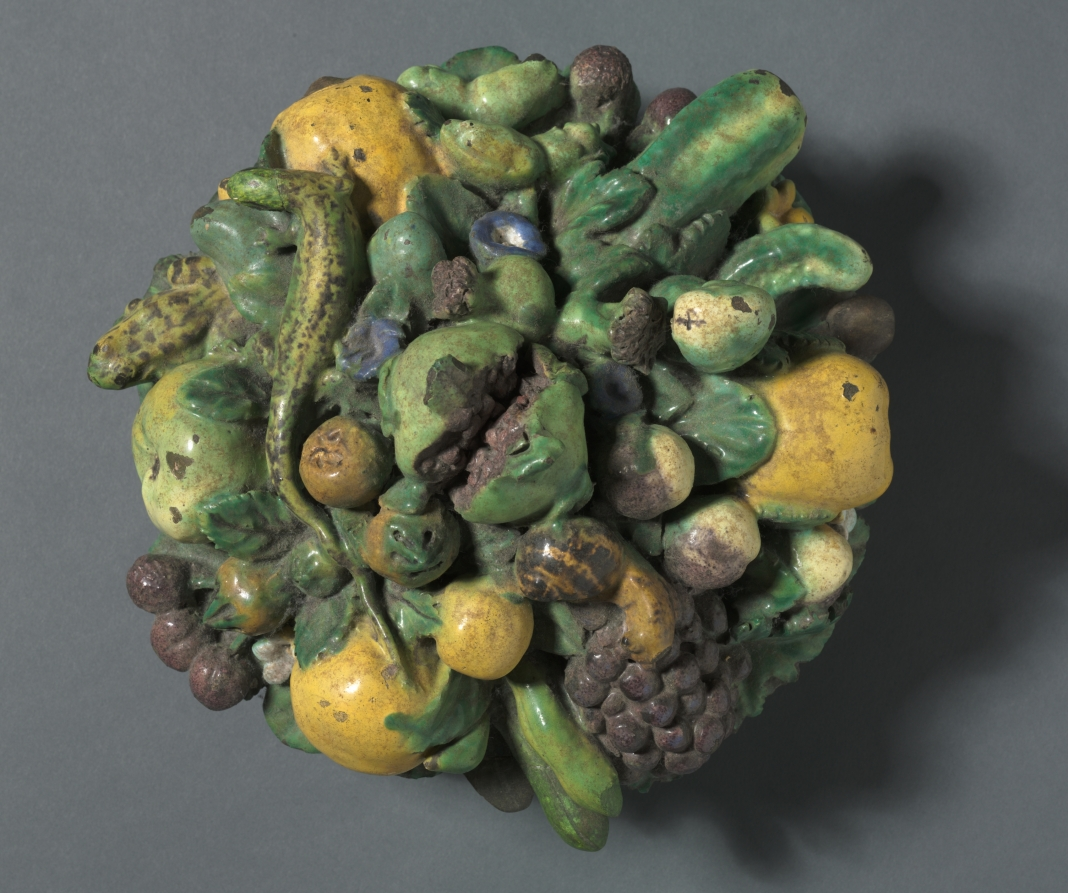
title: Dovizia (Plenty)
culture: Italy, Florence, 16th century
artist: Giovanni della Robbia (Italian, 1469–1529/30)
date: c. 1520–29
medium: glazed terracotta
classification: Sculpture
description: Many elite Florentine Renaissance homes had sculptures of idealized young women carrying nature’s bounty, such as this work. The motif stems from a statue by Donatello (about 1386–1466) that towered over Florence’s main public market. At home, however, the sculpture became a talisman for the family’s well-being. The city-state’s low birth rate was a serious political matter, and such a sculpture was believed to stimulate fertility while also promoting motherhood and bolstering financial success.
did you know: Inspired by an over life-sized, public sculpture by Donatello, Giovanni della Robbia reduced the figure for a domestic setting.